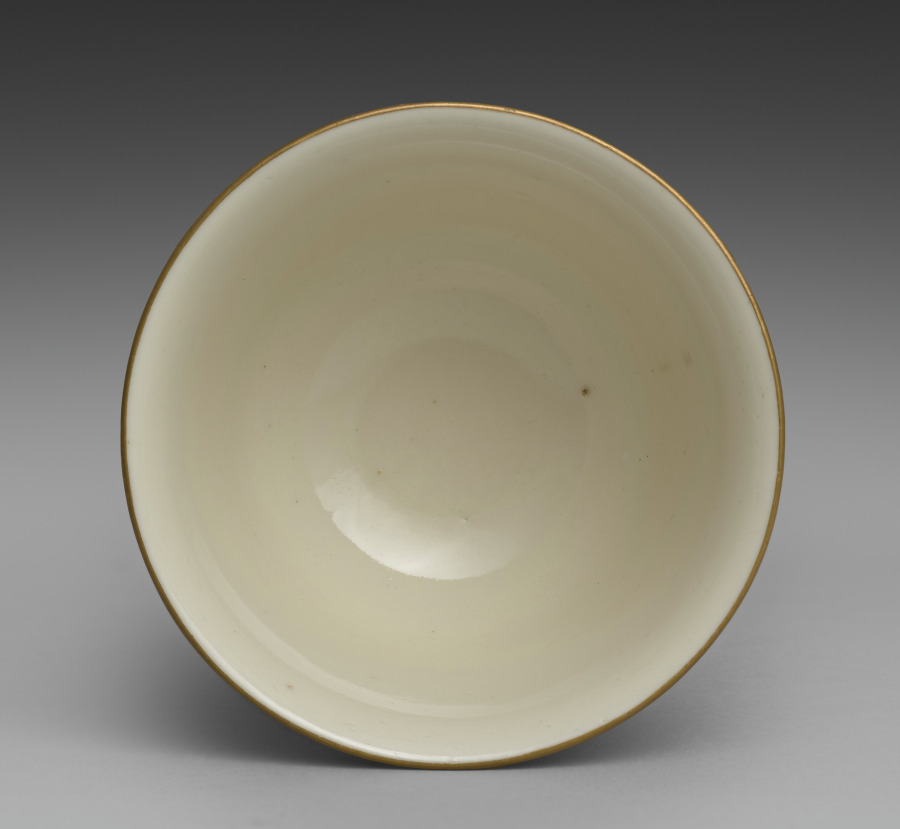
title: Drinking Cup from Dining Set with Plum Blossoms and Cracked-Ice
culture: Japan, Meiji period (1868–1912)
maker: Seifū Yohei II (Japanese, 1844–1878)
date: c. 1875–78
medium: Porcelain with molded designs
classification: Ceramic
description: Each item in this set has a delicate low-relief design of flowering plum branches over scattered, intersecting lines meant to resemble the cracked-ice surface of a frozen body of water and is signed on the base in gold pigment. While Yohei II produced many fine works in underglaze blue, like those produced by Kiyomizu Shichibei, he also made works in quite different styles later in his career, from the early 1870 s. In 1873, he was appointed purveyor to the Industrial Center of Kyoto Prefecture, a designation associated with Kyoto’s efforts to reach an international market through the port of Kobe; and from 1875 until his death, he was involved in national-level projects to present Japanese ceramics across the world. It was during this period that Yohei III was apprenticed to Yohei II, and it has been suggested that this set may in fact be an early example of Yohei III’s work, which he signed with his teacher’s name. Decorated with flowers resembling Japanese textile motifs, the set calls to mind the design of Yohei II’s pair of vases with plum blossoms in the Victoria and Albert Museum. Here, the elaborate trees created for a formal public exhibition setting have been translated into the approachable blossoms of the genteel domestic environment. While the designs are consistent across the pieces, each raised flower petal and pistil and each incised line in the ice was done by hand, so the cups, bowls, and dishes are similar yet unique. The bottoms of two boxes once identified the set’s owner, but the information has been deliberately obscured with black ink. However, inscriptions still visible appear to indicate two occasions, once at the end of July 1886 , and once again in June 1916 , when parts of the set were requested from Hokura in Niigata Prefecture. The location corresponds to a neighborhood in the present-day city of Jōetsu. The surname Tsuji 辻 also appears on a paper tag affixed to one of the box cloths. Future research may possibly reveal more about their provenance. A vase by Yohei III in a private collection combines the formal grandeur of the Yohei II vases in the Victoria and Albert Museum with the gentler design of this dining set, placing flowering plum trees against soft, scalloped-edge clouds resembling those in golden screens.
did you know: The dining wares have a creamy white coloration that the four boxes containing them identify as Korean in style.